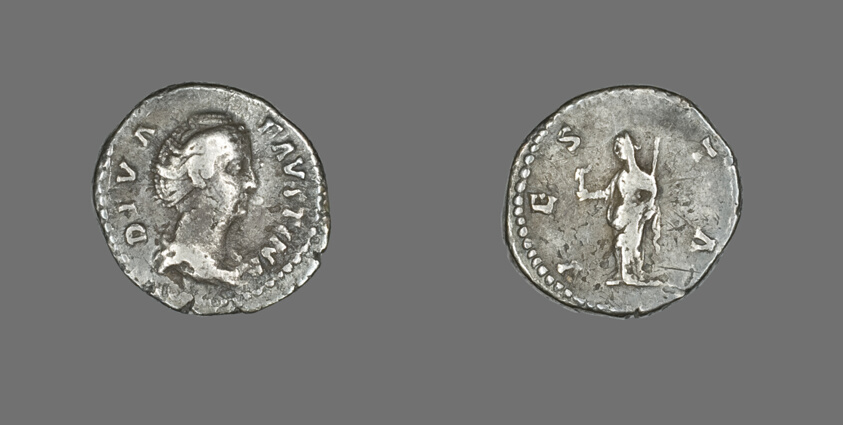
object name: Coin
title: Denarius (Coin) Portraying Empress Faustina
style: roman (ancient, style or period)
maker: Roman, minted in Rome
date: after 141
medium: Silver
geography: Roman Empire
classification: coin; ancient art